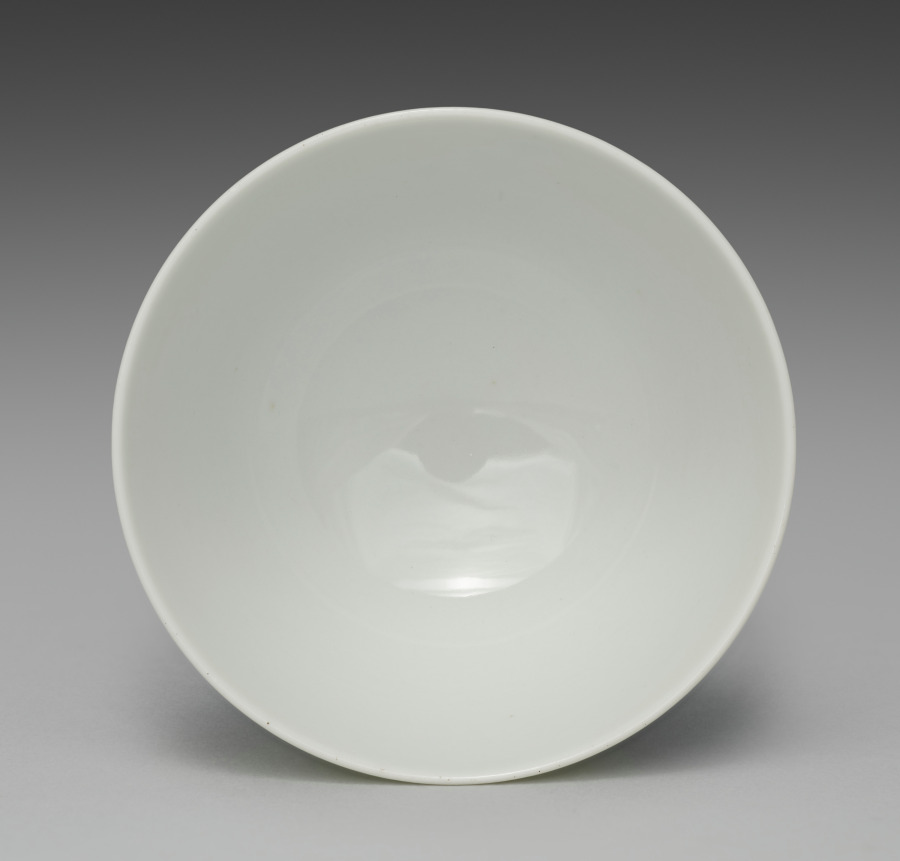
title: Teacup from Tea Set with Orchids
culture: Japan, Meiji period (1868–1912)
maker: Seifū Yohei III (Japanese, 1851–1914)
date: c. 1893–1914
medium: Porcelain with underglaze blue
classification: Ceramic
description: Although the teapot here is stored in a separate box from the five cups, these six pieces may once have been part of a tea set that included other tools such as a water cooler. The teacups have orchid flowers on both sides in underglaze blue, as well as a blue band inside the footring. The teapot has the same design and a blue band painted around the bottom of the lid’s knob. The cups’ long wood storage box is stamped on the exterior, over the lid and base, with a small red seal reading “Satō.” The same seal appears on five small squares of yellow textile, one placed in the bottom of each compartment in the teacup storage box. These are additional to the customary yellow cloths stamped with a “Seifu” seal. Interestingly, four of the Seifū cloths are stamped with an ovoid seal, while the remaining cloth, which is a slightly lighter color, has an unusual seal that is not quite gourd-shaped and with the fū of Seifū in a stylized, unrecognizable form. The teapot has its own box with a Satō seal and is wrapped with an orange textile stamped with the same unusual Seifū seal. A set with a very similar surface design is in the Brooklyn Museum. The Brooklyn set has a water cooler and a small pitcher, in addition to the teapot and cups, and all are in a single storage box. This box records the tea tools as made with kanpakuji, or “bright-jewel white porcelain,” counted among Yohei III’s most important inventions, and carved images. In fact, both sets have a white surface much closer in coloration to the cool white of porcelain clay used in Kyoto at the time, and the designs are simply painted. The Brooklyn set was thus likely mismatched at some point with a box intended for another tea set. Nonetheless, the box may have helped prevent the set’s original components from being dispersed, and the set itself provides insight into how the other tools from the present set may have looked.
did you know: This tea set with orchids has a side-handled pot called a kyūsu, used for steeping, straining, and serving tea.